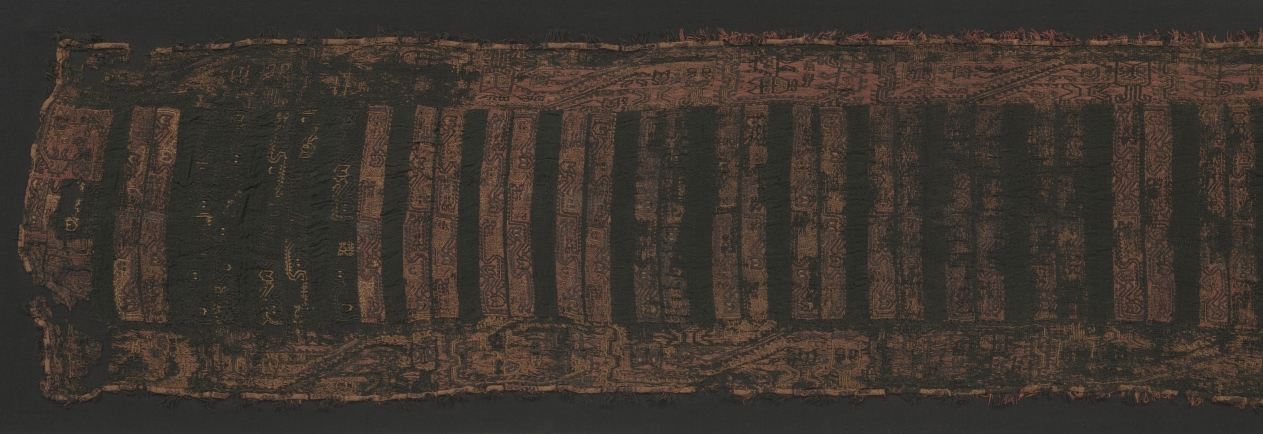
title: Headcloth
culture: Peru, South Coast, Paracas, Middle Period, c. 600-400 BC (Early Horizon, Epoch 10)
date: c. 600–400 BCE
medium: embroidery on tabby cloth; needle reseau and fringe at border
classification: Textile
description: The embroidered design consists entirely of felines, some of which are depicted with trophy heads. Both are very common motifs of Paracas art. The linear and highly stylized design as well as the limited spectrum of colors are characteristic of Paracas embroideries from the Middle Period.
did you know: Extremely dry conditions on Peru's desert coast allow for the extraordinary preservation of textiles.